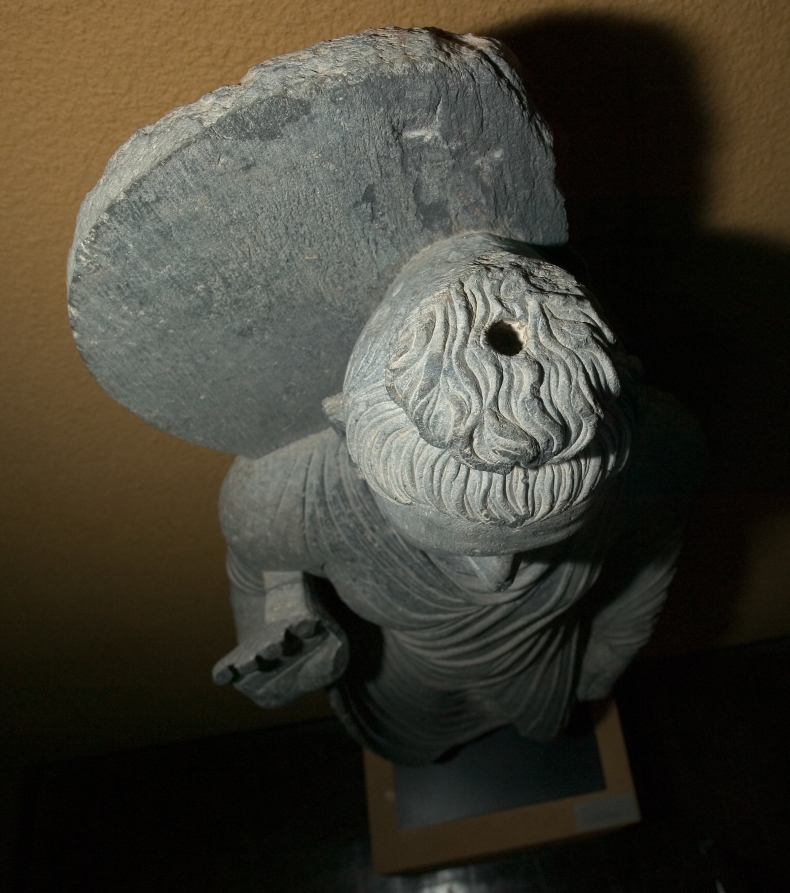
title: Standing Buddha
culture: Pakistan, Gandhara, Kushan period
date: 150–200 CE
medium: schist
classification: Sculpture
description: Combining elements from both the Mediterranean and South Asian worlds, the artists of Gandhara created a new vision of the Buddha during the period of high contact between the two regions from the 100s to 200s AD. They were among the first to show the Buddha with a placid expression, thick wavy hair, and clothed in a heavy, toga-like monk’s robe.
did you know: The cavity at the top of the head may have once held a portion of the Buddha's relics.